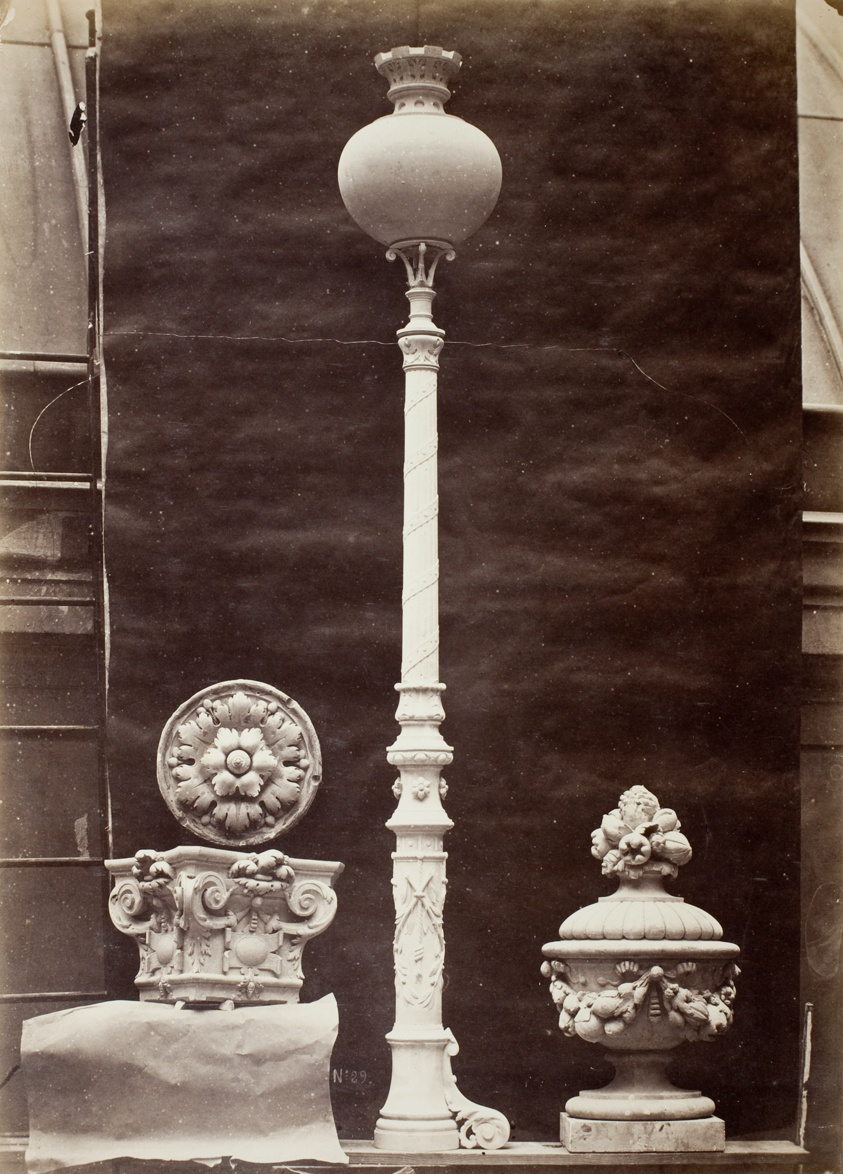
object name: Photograph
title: Interior Details and Candelabra, Théâtre du Vaudeville, Paris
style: 19th century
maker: Louis-Emile Durandelle (French, 1839–1917)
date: 1869, printed 1875/76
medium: Albumen print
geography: France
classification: photograph; albumen silver print; photography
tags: Paris, architecture